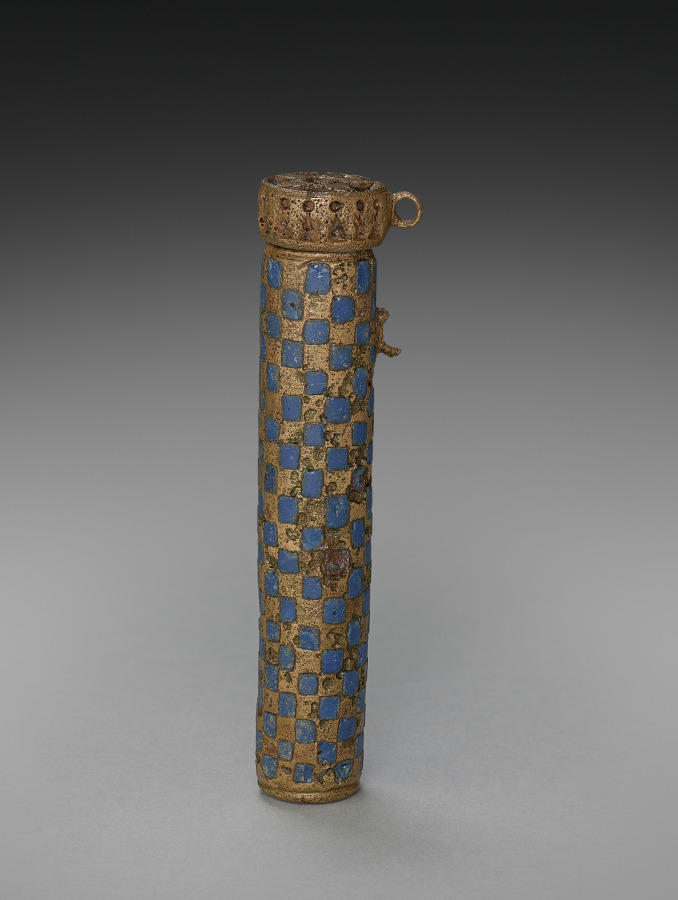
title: Kohl Tube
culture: Egypt, Greco-Roman period (332 BCE–395 CE), Ptolemaic dynasty (305–30 BCE)–Roman empire (30 BCE–395 CE)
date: 305 BCE–395 CE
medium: brass with blue enamel decoration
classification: Cosmetic Objects